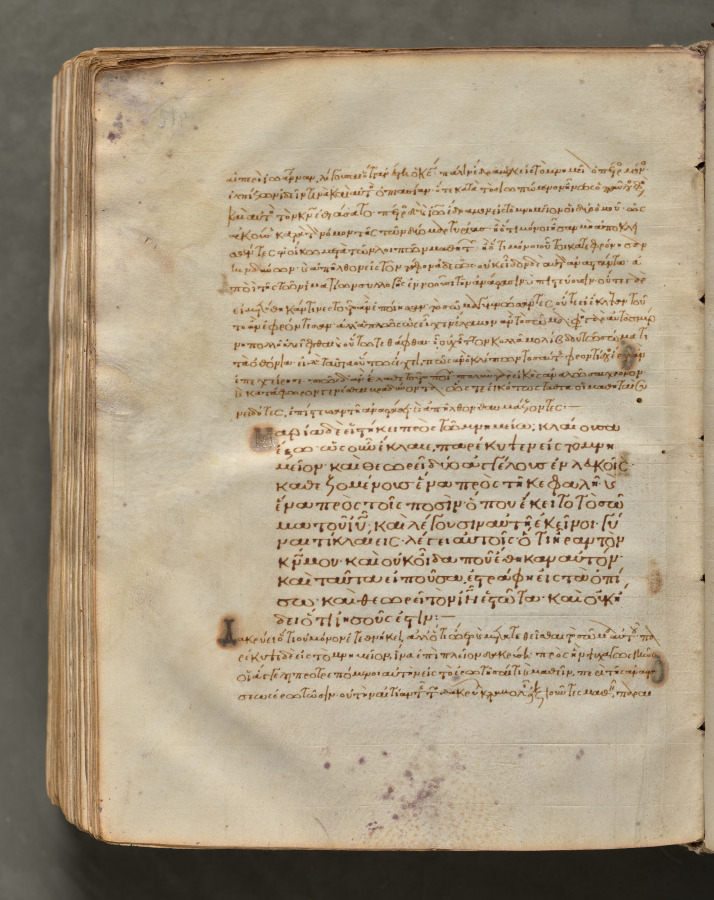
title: Text, folio 418 (verso), from a Gospel Book with Commentaries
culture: Byzantium, Constantinople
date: c. 1000–1100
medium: ink, tempera, and gold on vellum; leather binding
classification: Bound Volume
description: Each of the four gospels in this book opens on a page with brilliantly illuminated borders depicting the author of the text as well as birds—principally peacocks, symbols of the immortality of the soul—and fountains, representing the fountain of life and the salvation of the soul. This volume consists of 428 leaves with texts in Greek. Its level of sophistication suggests that it was probably written and decorated in a monastery in Constantinople.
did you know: Gospel books were carried in procession through Byzantine churches.